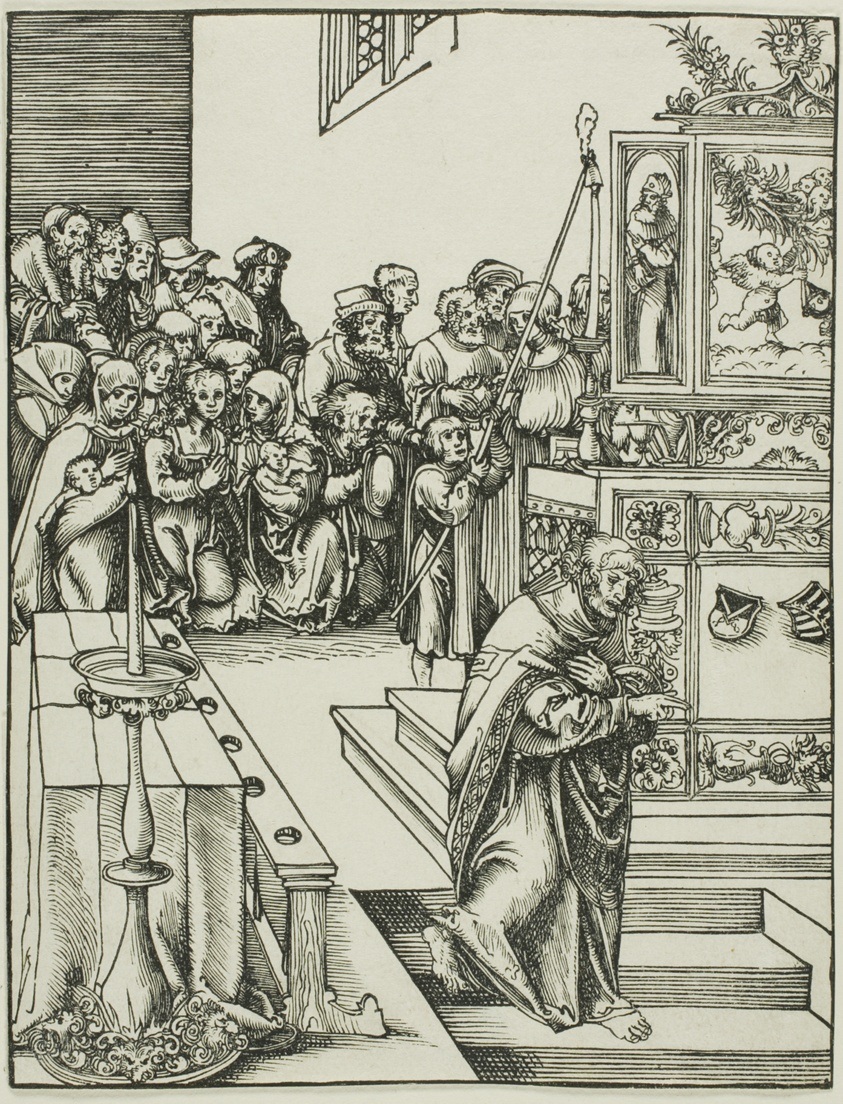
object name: Print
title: Saint John, from The Martyrdom of the Apostles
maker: Lucas Cranach the Elder (German, 1472-1553)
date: c. 1512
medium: Woodcut in black on ivory laid paper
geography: Germany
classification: woodcut; print; prints and drawing